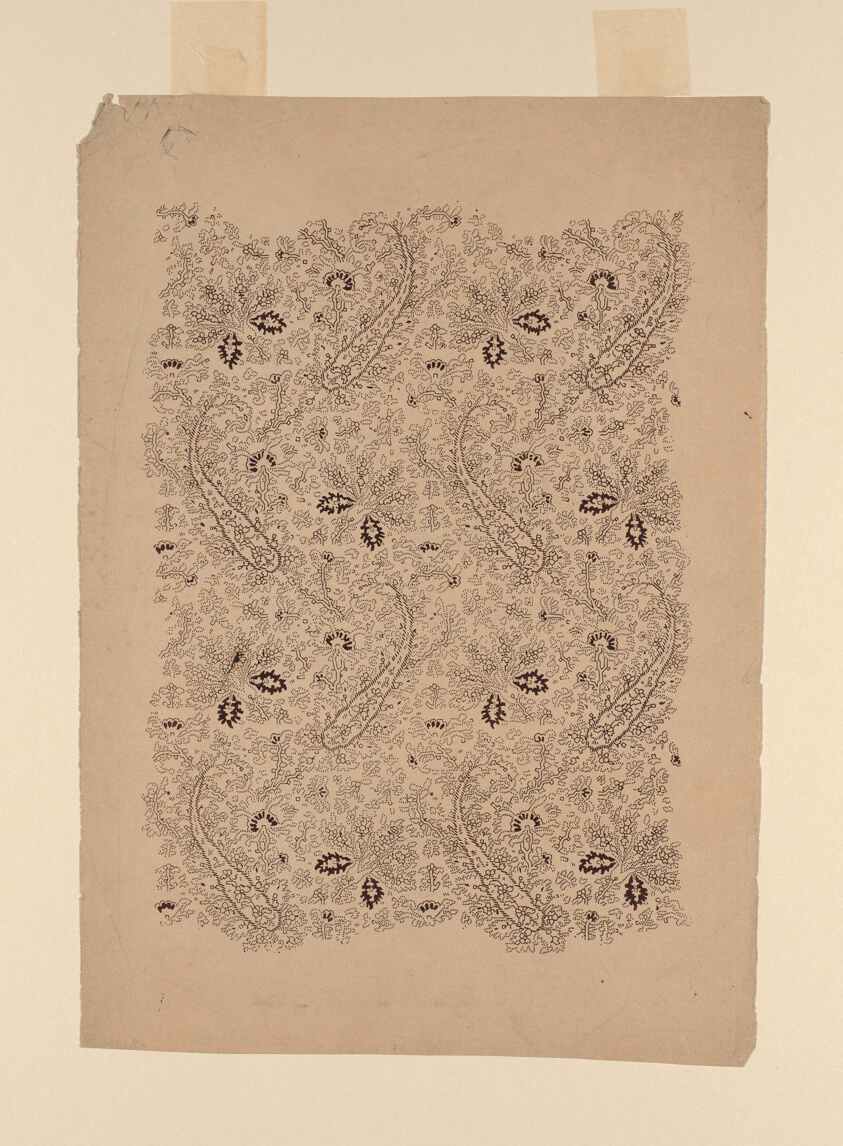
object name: Textile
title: Design for a Woven Fabric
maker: Europe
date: 19th century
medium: Ink on paper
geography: Europe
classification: textile; accessory - paper design; accessories (object genre)